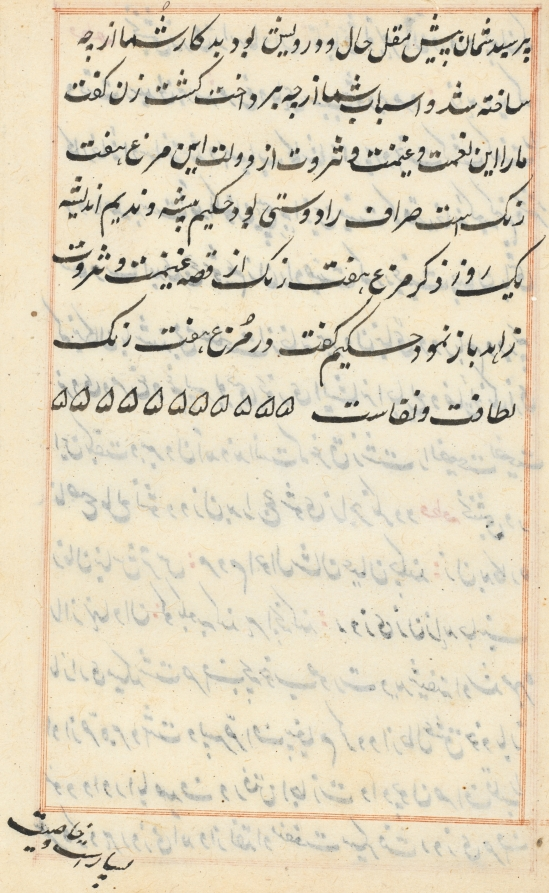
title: Page from Tales of a Parrot (Tuti-nama): text page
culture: Mughal India, court of Akbar (reigned 1556–1605)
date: c. 1560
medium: gum tempera, ink, and gold on paper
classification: Painting